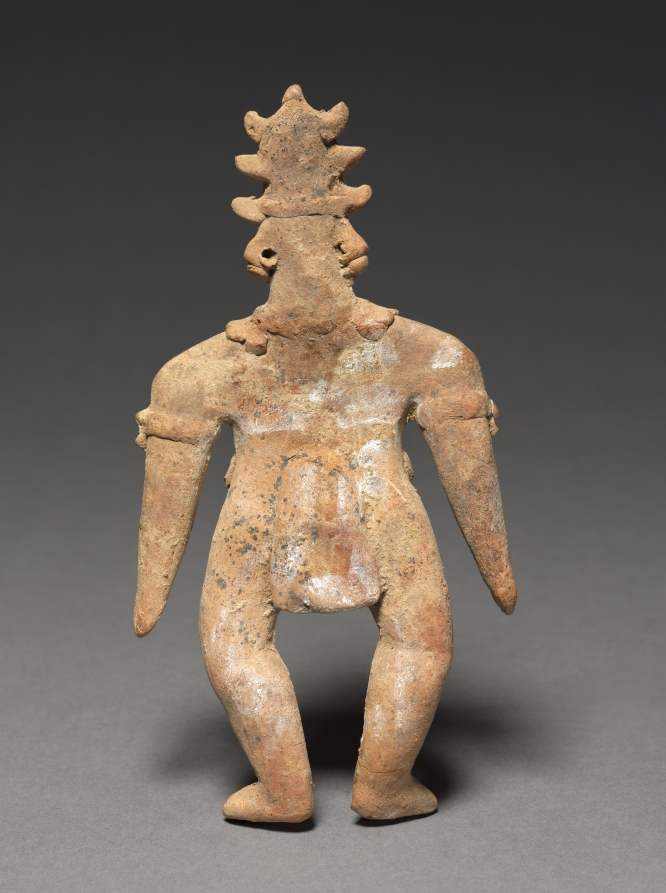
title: Flat Male Figure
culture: Mesoamerica, West Mexico, Colima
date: 200 BCE–300 CE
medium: ceramic, pigment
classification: Sculpture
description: Clay figurines were the earliest and most common art form in Mexico and other countries in the ancient Mesoamerican (Middle American) culture region. Made first by hand and later with molds, most figurines belong to the traditions of commoners, such as farmers, rather than those of elites.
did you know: Clay figurines were the earliest and most common art form in the ancient Mesoamerican culture region.